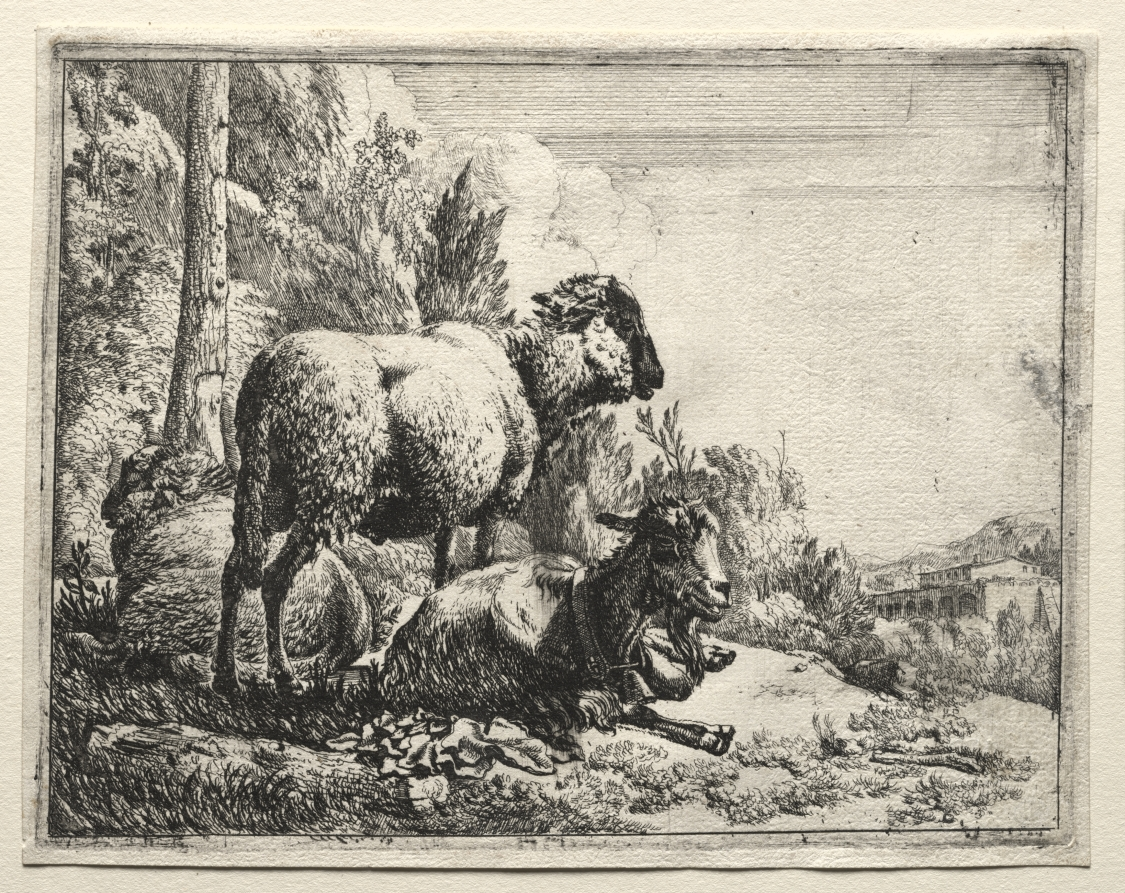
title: Goat with Bell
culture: Germany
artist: Johann Heinrich Roos (German, 1631–1685)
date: 1665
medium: etching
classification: Print